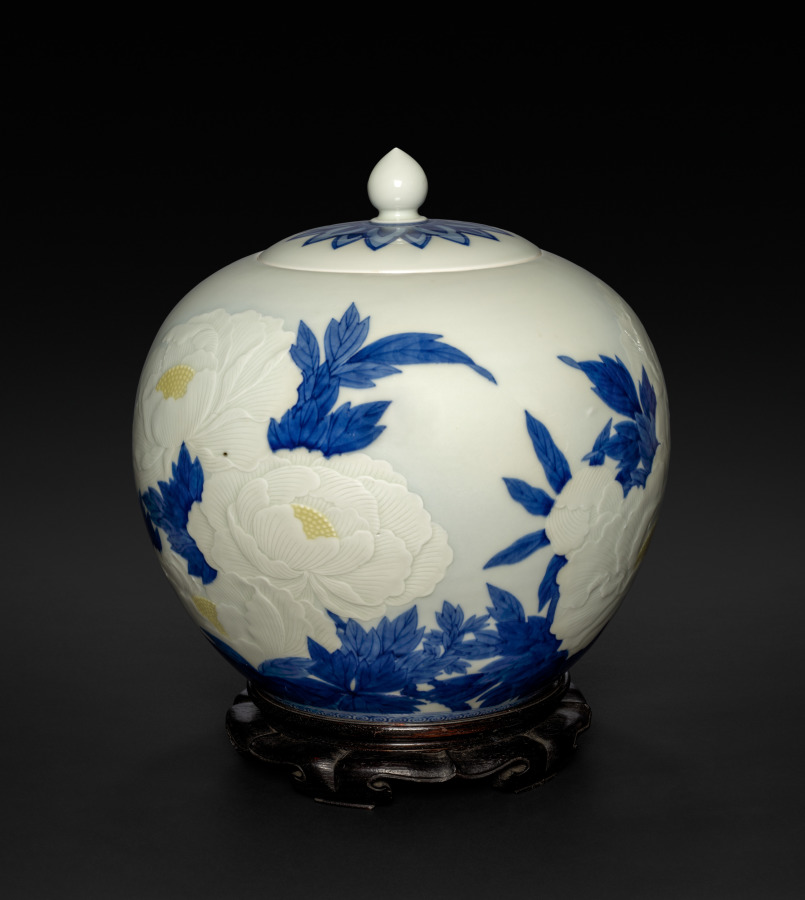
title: Lidded Jar with Peonies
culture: Japan, Meiji period (1868–1912)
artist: Seifū Yohei III (Japanese, 1851–1914)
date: 1897–1912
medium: Porcelain with molded and carved design and underglaze color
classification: Ceramic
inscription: 大日本清風造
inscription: 金聲玉振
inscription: 帝室技芸員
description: The petals of the large, white peonies on this jar were made by applying molded clay to the body and incising the clay with lines for definition. The flowers’ centers were then painted with yellow, along with the leaves in cobalt blue line and wash. A subtle blue gradation was also added all around the flowers using a masking method. The lid, with its treasured jewel-shaped finial, was also decorated with foliate motifs in underglaze cobalt blue. Finally, a transparent glaze was applied over the entire body of both the jar and lid. It is a special demonstration of Yohei III’s use of precision and control to create a completely balanced composition.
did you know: Seifū Yohei III drew inspiration from Qing dynasty Chinese wares but experimented widely with new glazing techniques.